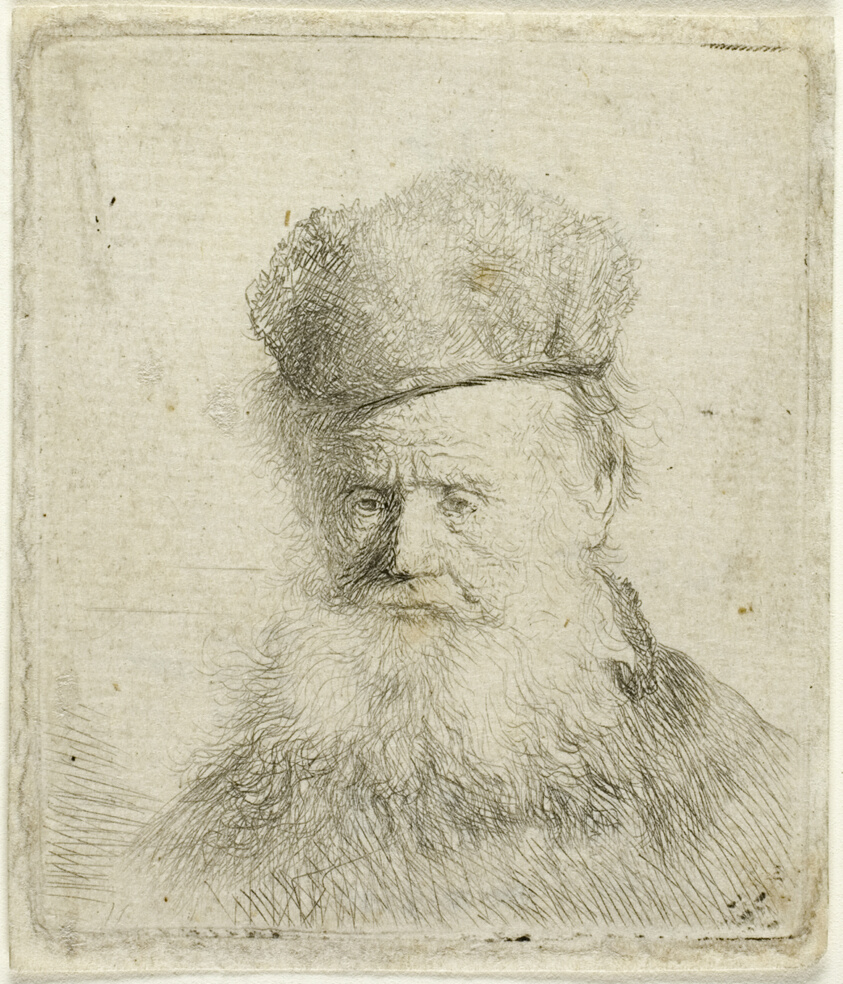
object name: Print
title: Bust of an Old Man with a Fur Cap and Flowing Beard, Nearly Full Face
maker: Rembrandt van Rijn (Dutch, 1606-1669)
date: c. 1631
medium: Etching on paper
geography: Holland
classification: etching; print; prints and drawing; paper